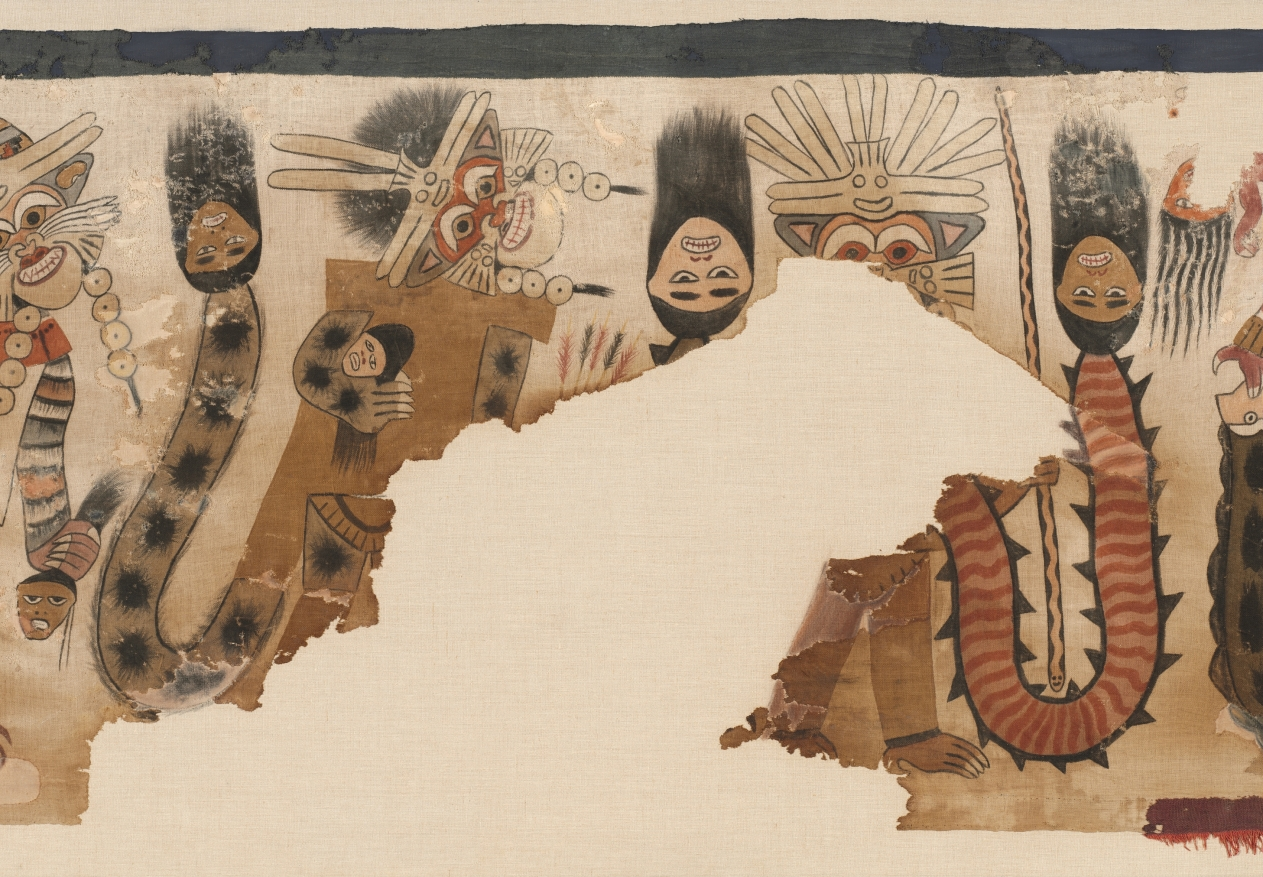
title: Cloth with Procession of Figures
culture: Central Andes, South Coast, Nasca people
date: 170 BCE–70 CE (radiocarbon date, 95% probability)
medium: cotton and pigment (field); camelid fiber (borders and fringe)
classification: Textile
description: Experts agree that this cloth is one of the greatest paintings to survive from Andean antiquity due to the realism, complexity, large size, and refined execution of its figures. All but one of the figures wear the whiskered mouth mask of Nasca supernatural beings and several carry or wear severed human heads, which the Nasca linked to nature’s fruitfulness. Thus, the figures seem to represent supernatural forces or humans personifying such forces during a ritual devoted to agricultural fertility. Originally, the panel was attached along its upper edge to a dark blue cloth of equal size. The complete textile may have served as a mantle (a shawl-like garment), a hanging, or a funerary offering.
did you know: Characteristics of the pampas cat and the emperor tamarin monkey are visible in the marching figures.